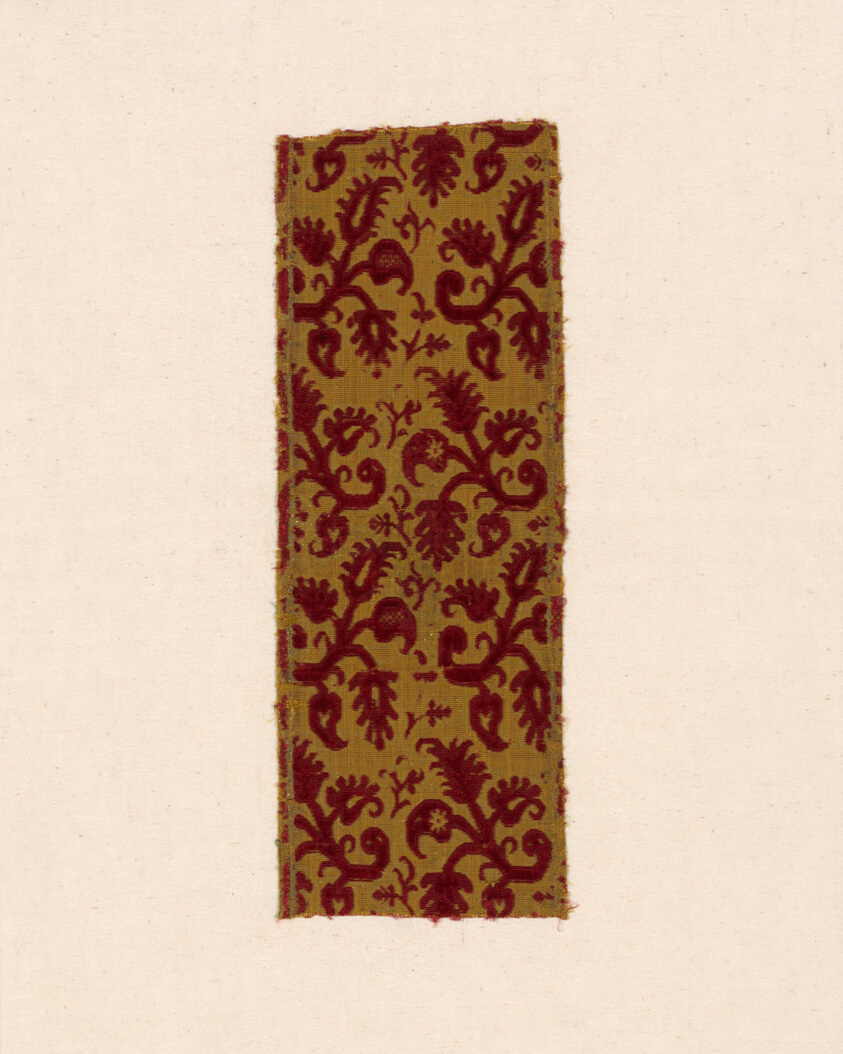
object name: Textile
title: Fragment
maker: Italy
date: 1601/25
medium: Silk, plain weave with gilt-metal strip supplementary facing wefts with supplementary pile warps forming cut and uncut voided velvet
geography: Italy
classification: textile; weaving - velvet